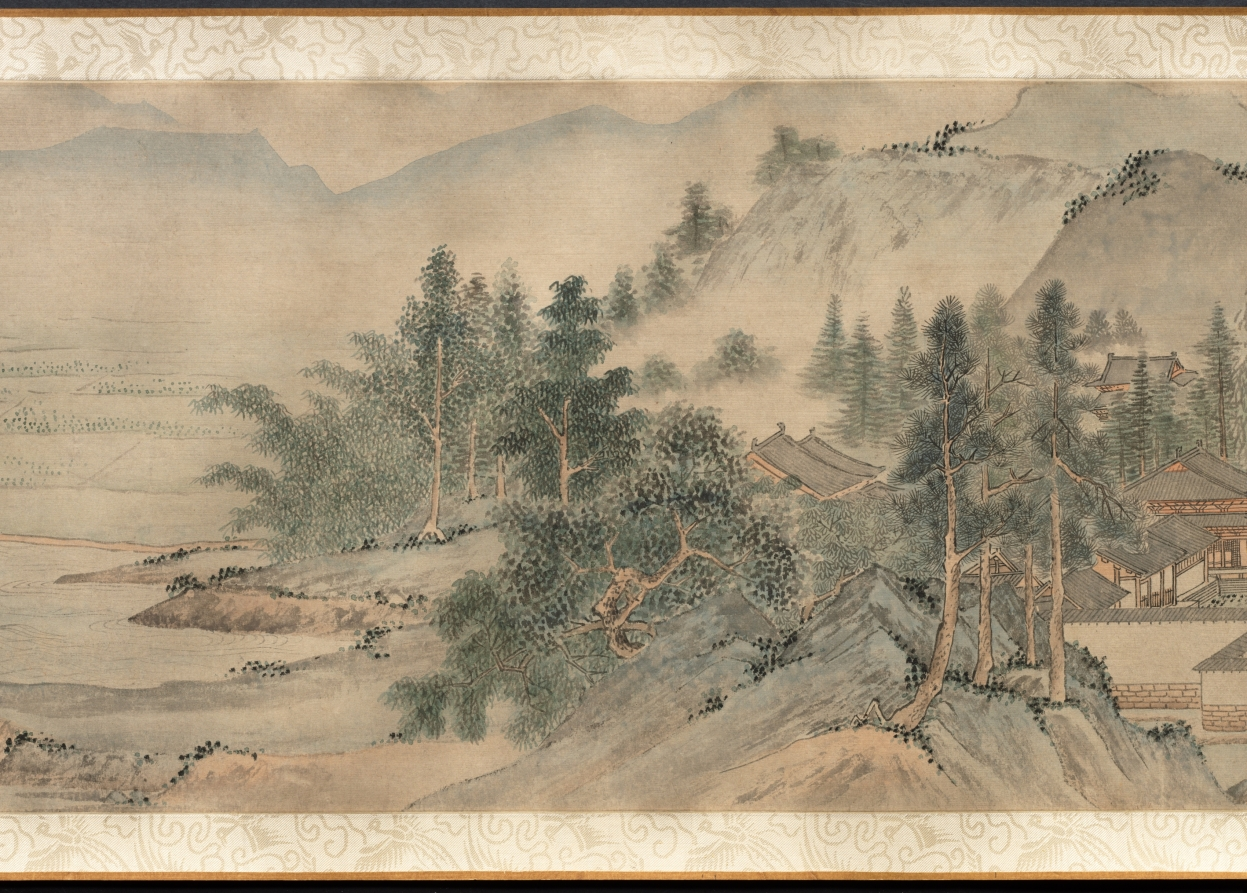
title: Ten Thousand Li of the Yangzi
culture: China, Ming dynasty (1368–1644)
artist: Dai Jin (Chinese, 1388–1462)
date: c. 1400s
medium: Handscroll; ink and color on paper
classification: Painting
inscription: Two colophons at end. Artist's seals: Dai Jin 戴進 and Wenjin 文進.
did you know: Dai Jin is traditionally considered the founder of the Zhe School, a style of landscape painting.